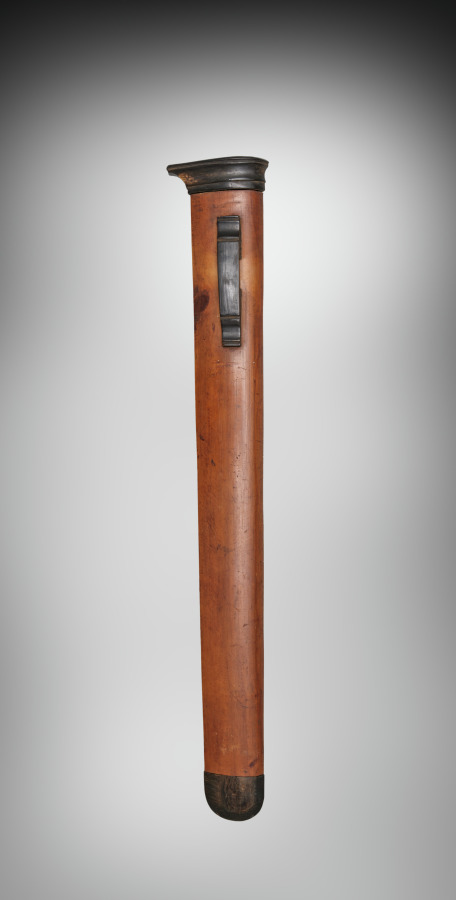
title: Sword and Scabbard (scabbard)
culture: Java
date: 1700s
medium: steel and ivory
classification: Arms and Armor